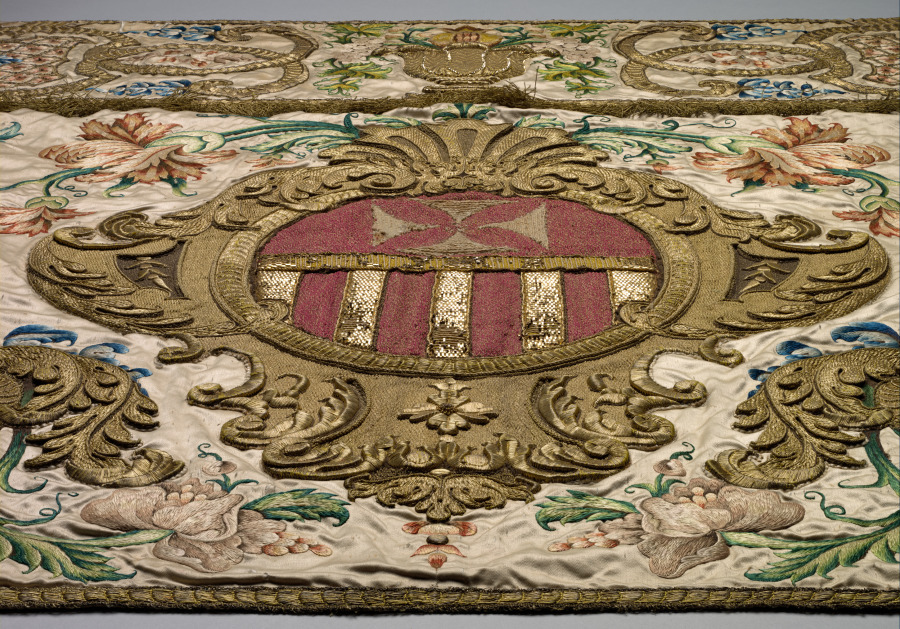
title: Embroidered Front of an Altar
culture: Italy or Spain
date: 1600s–1700s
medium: Satin and silk: embroidery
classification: Embroidery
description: This spectacular cloth with raised three-dimensional embroidery embellished the front of an altar. Lavishly applied gilt-metal thread creates architectural embellishments enhanced by grand vases displaying sheaves of wheat in the upper corners and bunches of grapes in the center of the fringed over-frontal, referring to the bread and wine of the Mass. The central coat of arms represents the Order of the Blessed Virgin Mary of Mercy, a Roman Catholic mendicant order established in 1218 by Saint Peter Nolasco in the city of Barcelona, Spain, then in the principality of Catalonia (crown of Aragon).